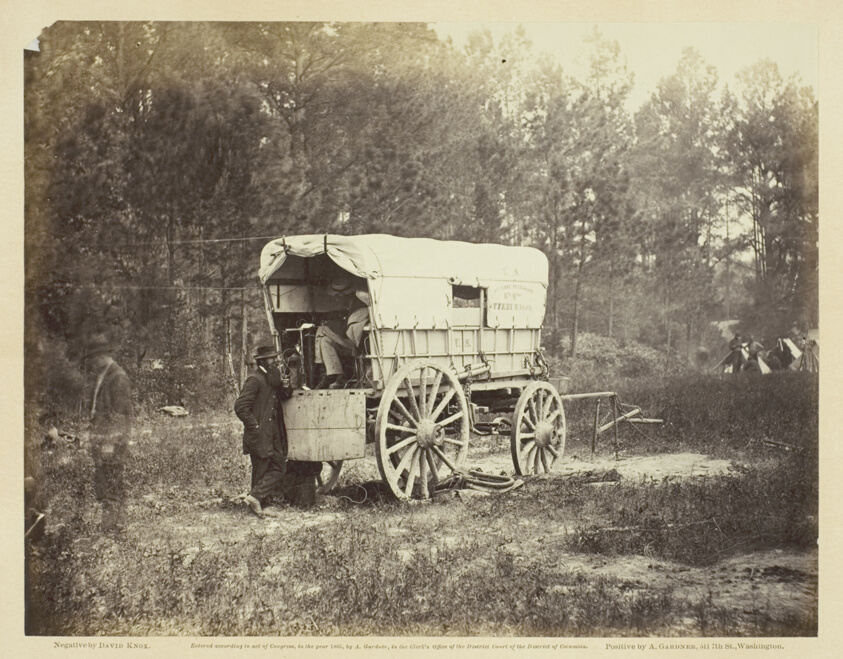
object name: Photograph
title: Field Telegraph, Battery Wagon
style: 19th century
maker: David Knox (American, active 19th century)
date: September 1864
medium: Albumen print, pl. 73 from the album "Gardner's Photographic Sketch Book of the War, Volume II" (1866)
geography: United States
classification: photograph; albumen silver print; photography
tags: Collected by Hugh Edwards, Gardner's Photographic Sketch Book